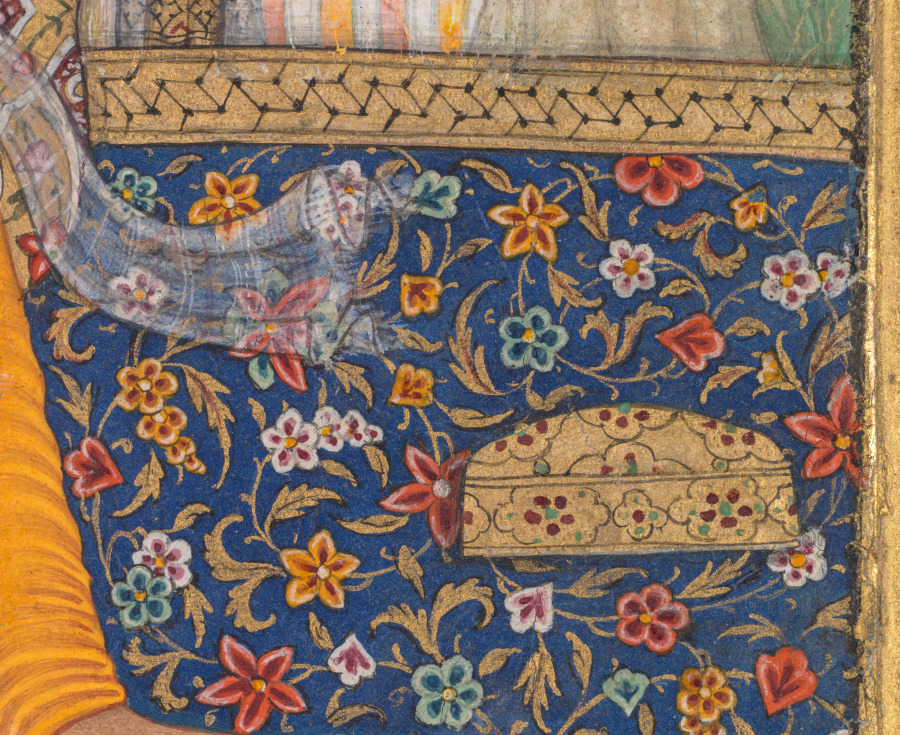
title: Lovers Embracing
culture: Mughal India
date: c. 1630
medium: Gum tempera and gold on paper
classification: Painting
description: The twining and coiling of the patterns on the carpet and large floor cushion mirror the interlaced bodies of the amorous couple. The clinging grapevine also references the wine they share from one cup. Such a carpet was not to be walked on, so the lovers do not wear shoes. It provides a luxurious furnishing to the intimate outdoor space. Here, the floral patterns evoke the pleasures of paradise. The textile patterns have been rendered with such precision that they appear like colorful enamel work or inlaid jewels. A covered golden box at right contains aromatic betel nut treats (paan) that freshen the breath.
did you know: Erotic metaphors in visual poetry: bees fly to blossoms as rain clouds approach.